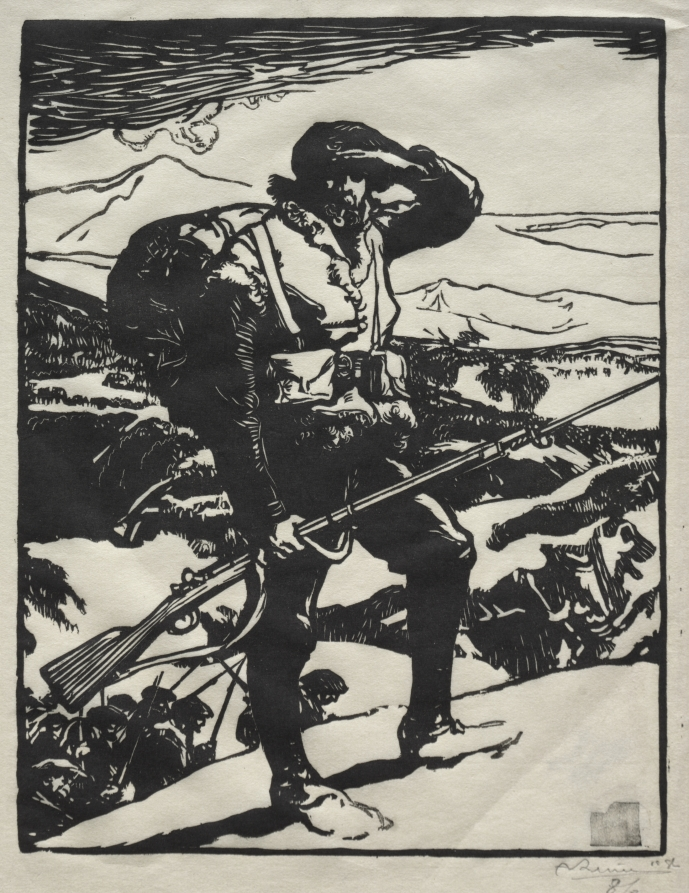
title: Chasseur Alpin Regardant La Plaine Du Rhin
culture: France, 19th-20th century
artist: Auguste Louis Lepère (French, 1849–1918)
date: 1919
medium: woodcut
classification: Print